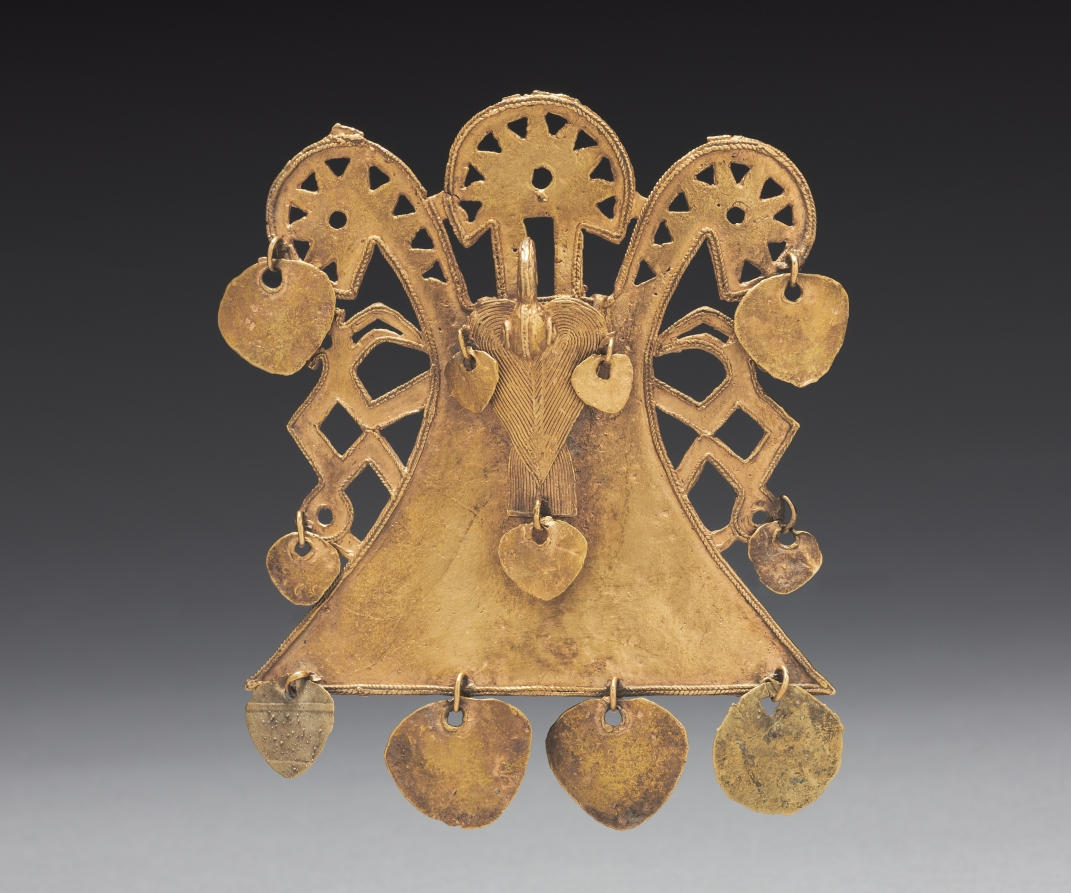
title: Bird Pendant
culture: Colombia, Muisca style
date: c. 900–1550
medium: cast gold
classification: Metalwork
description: This elaborate bird pendant was worn. It features delicate herringbone moldings, open-work patterns, and wing details-all part of the wax model from which the pendant was cast using the lost-wax process. The dangles were attached after casting.